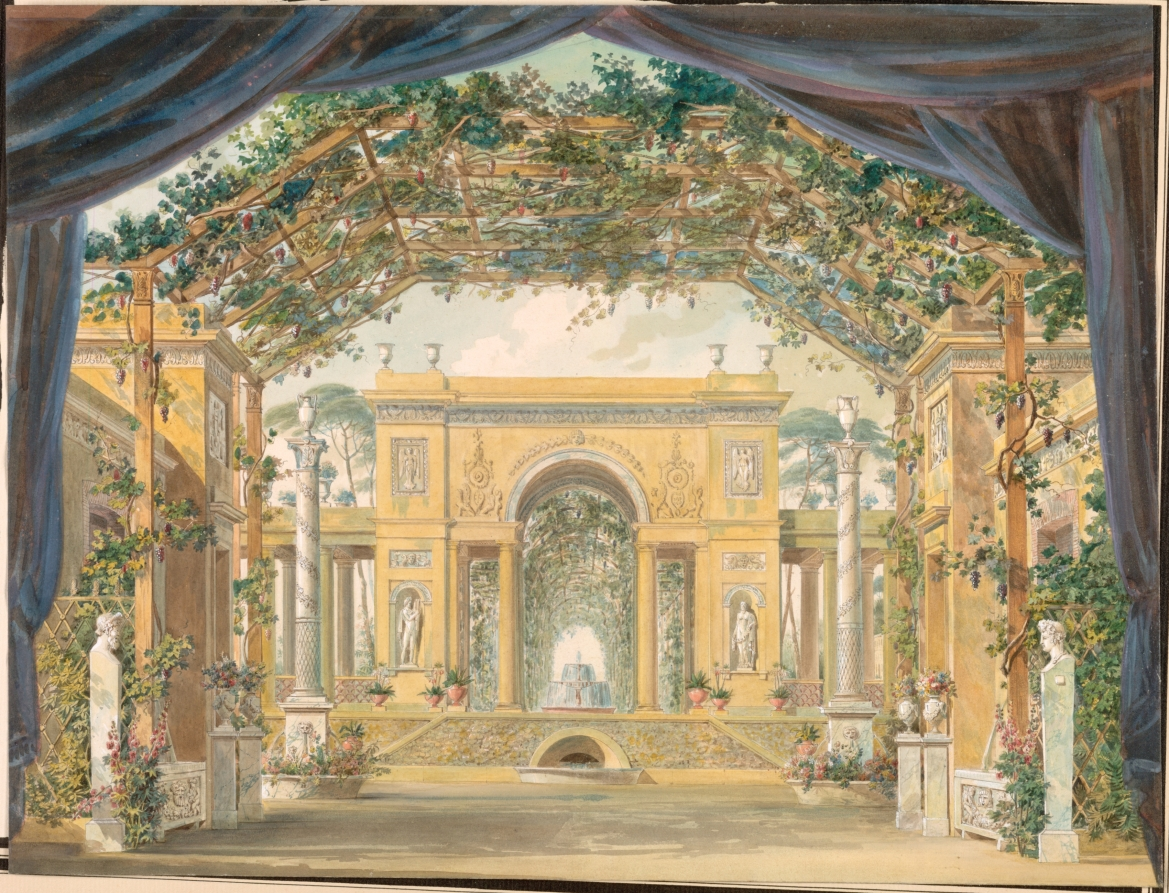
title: Decoration Executed for the Birthday of His Majesty the King of Westphalia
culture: France, 19th century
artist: Pierre-Luc-Charles Cicéri (French, 1782–1868)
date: 1811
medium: Pen and black ink and watercolor with graphite; heightened with white gouache on off-white wove paper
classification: Drawing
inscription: verso, center right, in graphite: 1930; secondary support, lower center, in graphite (under primary support): Bas; lower center, in brown ink: décoration Exécutée pour l'anniversaire de la naissance de S. M. le Roi de Wesphalie, / Ordonnée par Monsieur bruguière Surintendant des théatres. / Dessin exécuté au théâtre de Cassel en 1811, par cicéri, Ier ["er" underlined] peintre de l'Opéra.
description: A scenic designer for the Paris Opera, Cicéri created this decoration for a performance celebrating the birthday of Emperor Napoleon’s brother, Jérôme Bonaparte (1784–1860), King of Westphalia, a vassal state of territories taken from Prussia and its allies. Antoine-André Bruguière, named in the inscription as the commissioner of the decoration, was Westphalia’s secretary of the ministry of war and the superintendent of theaters in Kassel, the state’s capital city. The title of the special performance is unknown, but the triumphal arch, Corinthian columns topped with vases, and classical statues all suggest a Roman theme.